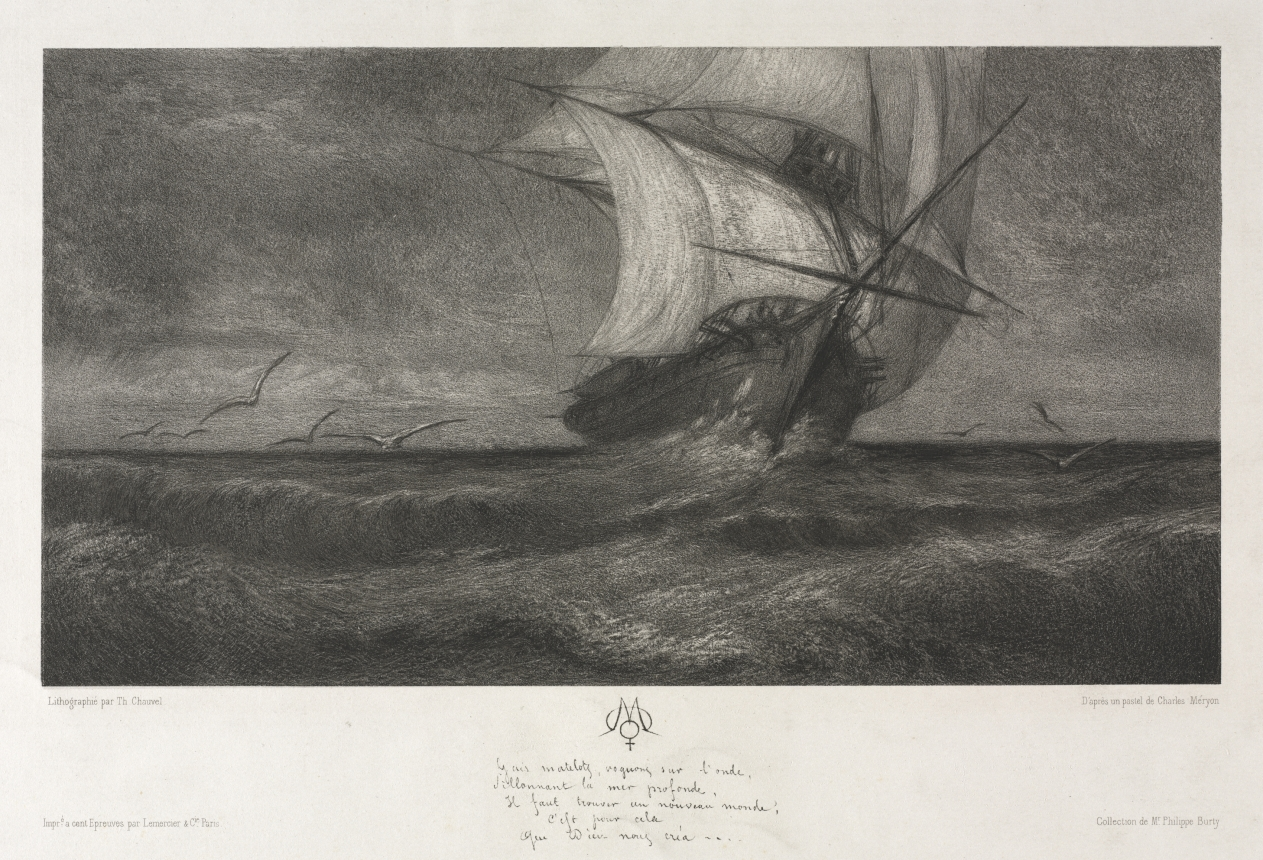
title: The Phantom Ship, or On the Waves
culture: France, 19th century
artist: Theophile Narcisse Chauvel (French, 1831–1909)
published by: Lemercier & Cie.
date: 1872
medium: lithograph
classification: Print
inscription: lower left, printed: "Lithographie par Th. Chauvel; Impré a cent Epreuves par Lemercier & Cie. Paris"; lower right, printed: "D'apres un pastel de Charles Méryon; Collection de Mr. Philippe Burty"